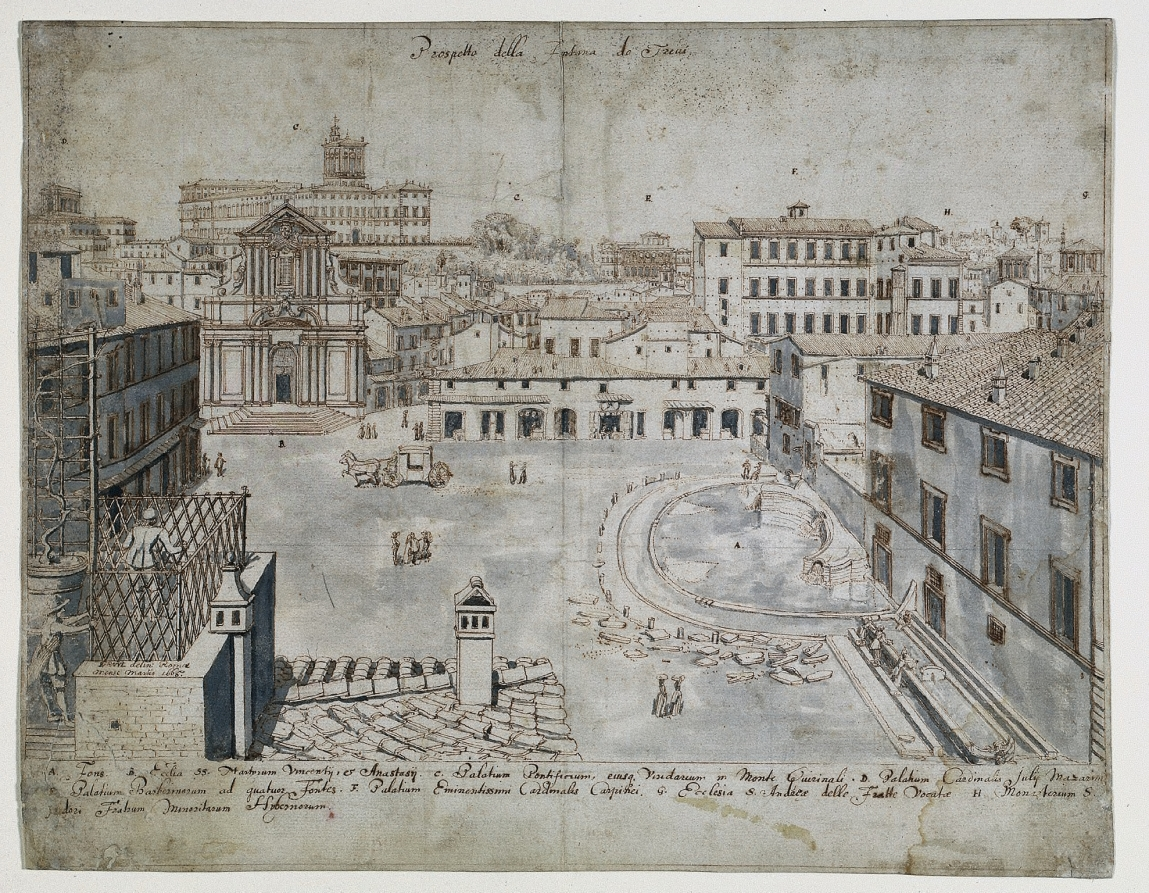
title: Eighteen Views of Rome: The Trevi Fountain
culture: Flanders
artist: Lievin Cruyl (Flemish, c. 1640-c. 1720)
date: 1665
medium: pen and brown ink and brush and gray wash over graphite; framing lines in brown ink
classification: Drawing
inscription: signed, lower left, in brown ink: [artist monogram: LC] RVYL delin: Romæ / mense martio 1665. ; by artist, upper center, in brown ink: Prospetto della Fontana de Trevi ; by artist, throughout composition, in brown ink: [the letters A-K] ; by artist, across bottom, in brown ink: A. Fons. B. Ecclia SS. Martyrium Vincentij, et Anastasij. C. Palatium Pontifiorum, eiusq. Viridarium in Mounte Quirinale. D. Palatium Cardinalis Julij Mazarini. / E. Palatium Barberiniorum ad quatuor Fontes. F. Palatium Eminentissimi Cardinalis Carpinei. G. Ecclesia S. Andreæ delle Fratte Vocatæ. H. Monasterium S. / I[si]dori Fratrum Minoritarum Hybernorum. ; ON PAPER STRIPS MOUNTED TO VERSO, lower left, in graphite: A20966 ; lower center, in graphite: E.19 ; ON PIECE OF PAPER APPLIED TO VERSO AS REPAIR, lower right, in brown ink: [illegible]